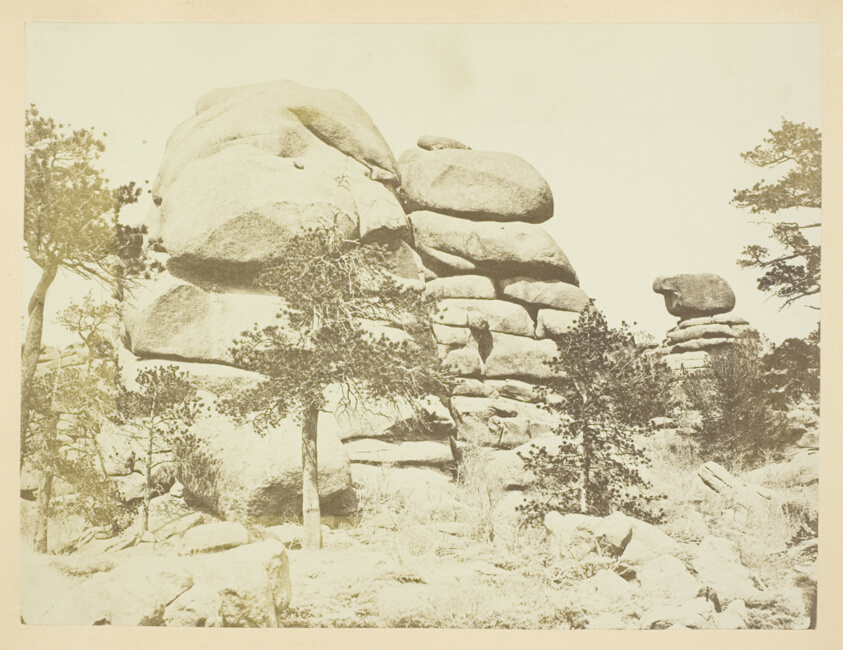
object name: Photograph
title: Granite Rock, Buford Station, Laramie Mountains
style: 19th century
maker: Andrew J. Russell; American, 1830–1902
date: 1868/69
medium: Albumen print, pl. II from the album "Sun Pictures of Rocky Mountain Scenery" (1870)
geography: United States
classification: photograph; albumen silver print; photography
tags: Collected by Hugh Edwards, landscapes